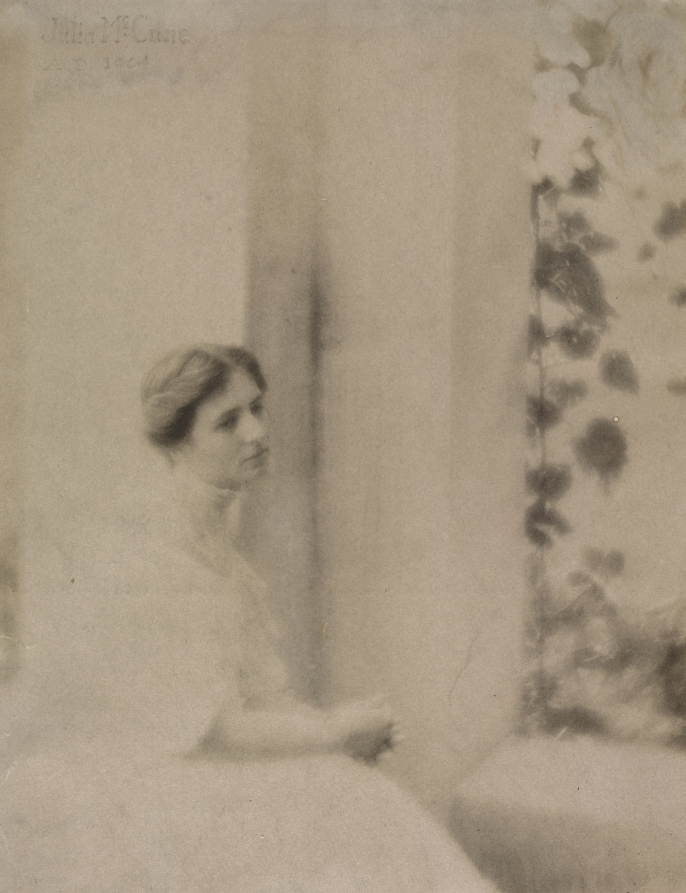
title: Julia Hall McCune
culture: America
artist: Clarence H. White (American, 1871–1925)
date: 1904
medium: platinum print with pencil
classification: Photograph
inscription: Written in pencil on recto of photo: "Julia McCune A.D. 1904"; in pencil on verso: "Julia McCune / by Clarence White 1897 [sic]"